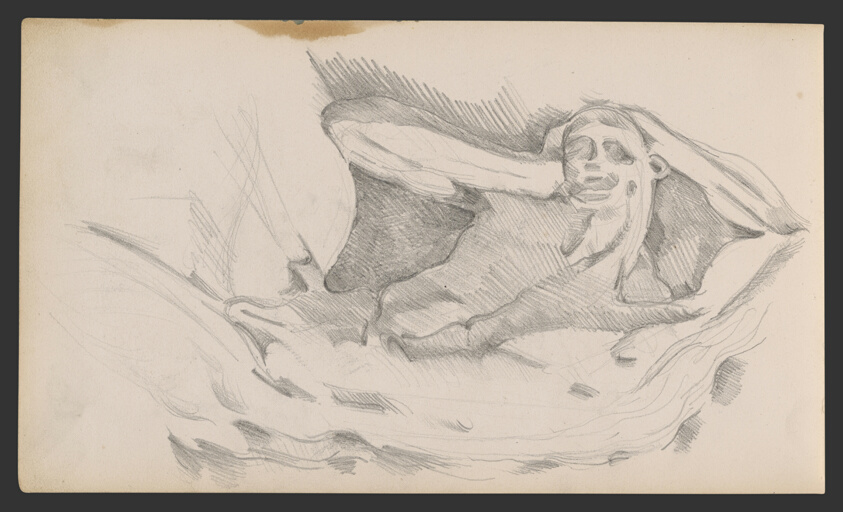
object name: Drawing and Watercolor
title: Sketchbook No. 2 (L'Estaque)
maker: Paul Cézanne; French, 1839-1906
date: 1875–86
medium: Graphite and pen and ink drawings on paper, bound into a book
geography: France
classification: sketchbook; graphite; prints and drawing; paper